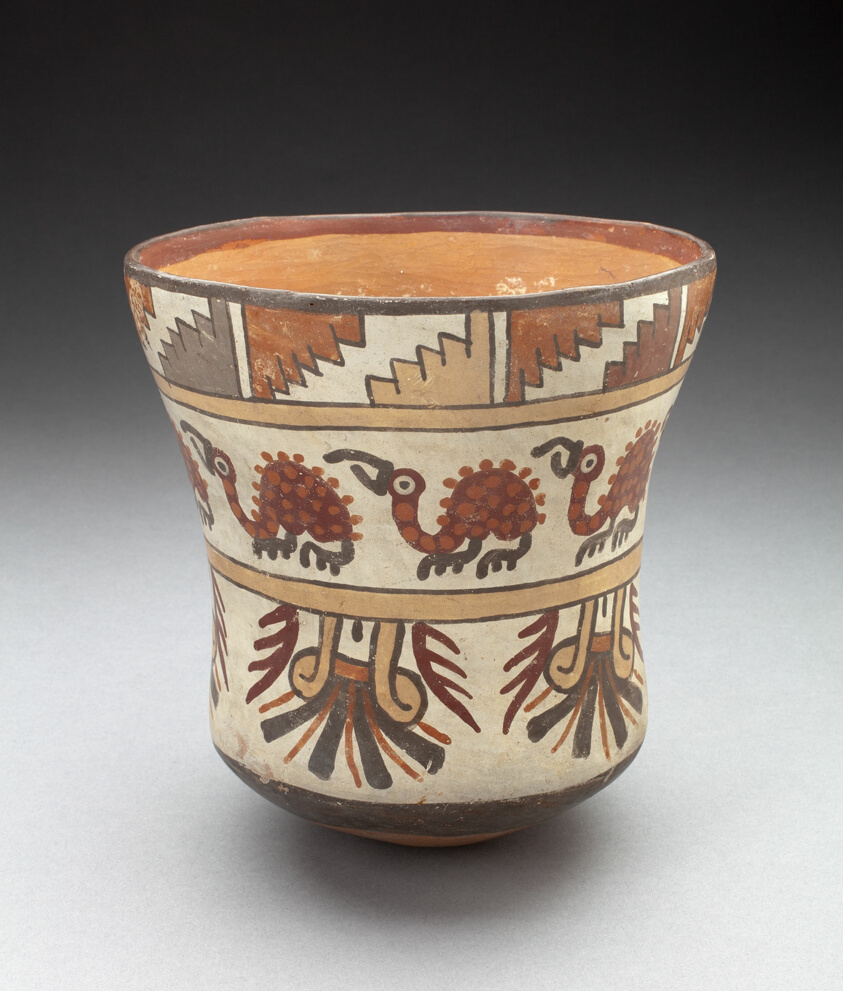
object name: Vessel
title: Beaker Depicting Bands of Spotted Birds and Geometric Motifs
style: nazca, early intermediate period, Pre-Columbian, americas, Arts of the Americas, andean, andes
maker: Nazca; South coast, Peru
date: 180 BCE–500 CE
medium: Ceramic and pigment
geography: Nazca Valley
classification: earthenware; art of the americas; ceramics; vessel